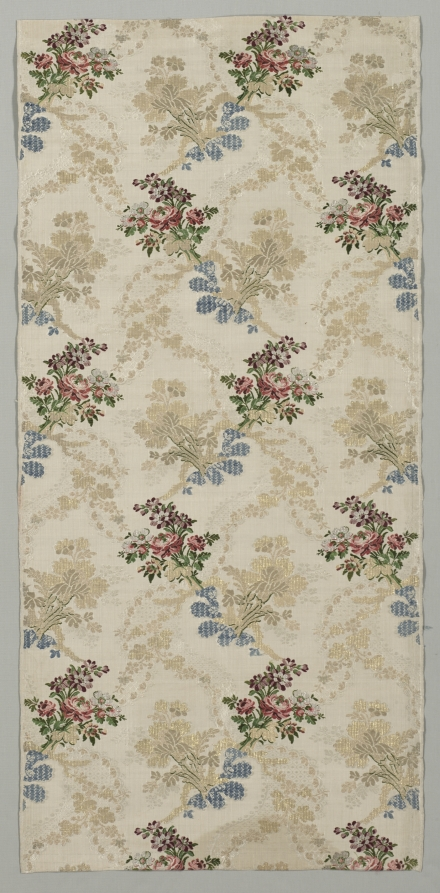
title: Length of Textile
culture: France, 18th century, period of Louis XV (1723-1774)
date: 1723–1774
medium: plain cloth, brocaded; silk and metal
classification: Textile